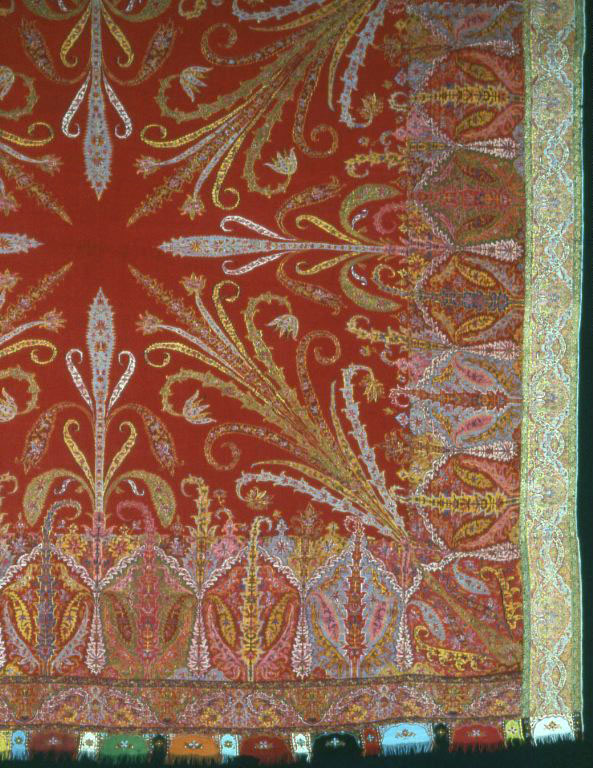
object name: Textile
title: Square Shawl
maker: India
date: 1825/75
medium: Wool, double interlocking twill tapestry weave, woven in rectangular sections; "Harlequin" tabs: pieced twill weaves; embroidered in running, satin, and stem stitches; laid work and couching; warp fringe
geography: India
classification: textile; needlework (visual works); weaving